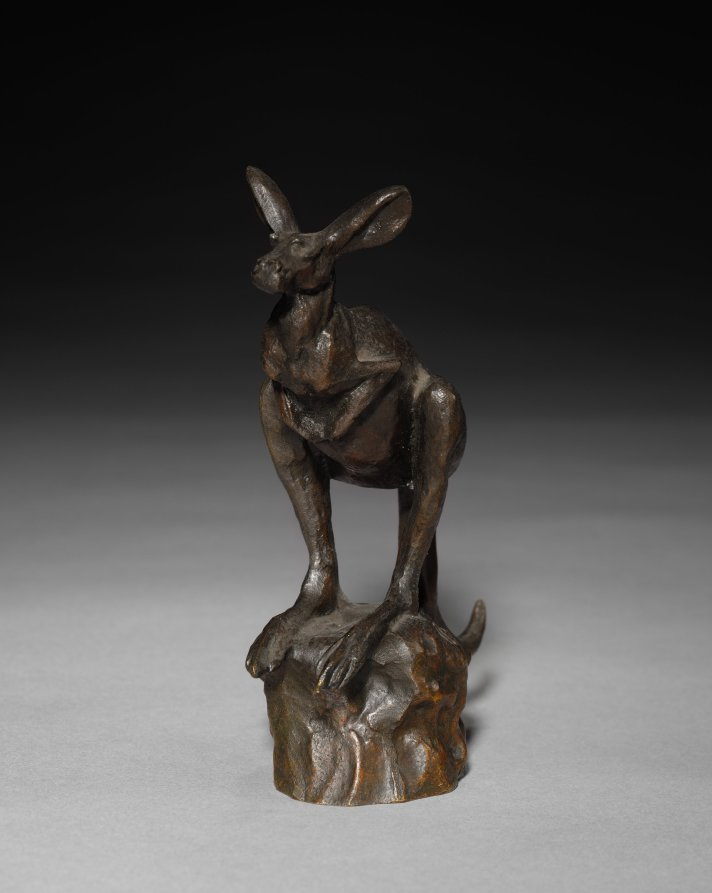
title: Kangaroo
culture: France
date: c. 1900–1925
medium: bronze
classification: Sculpture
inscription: Signed Nottot (?); ANDRO. FONDEUR, lower base